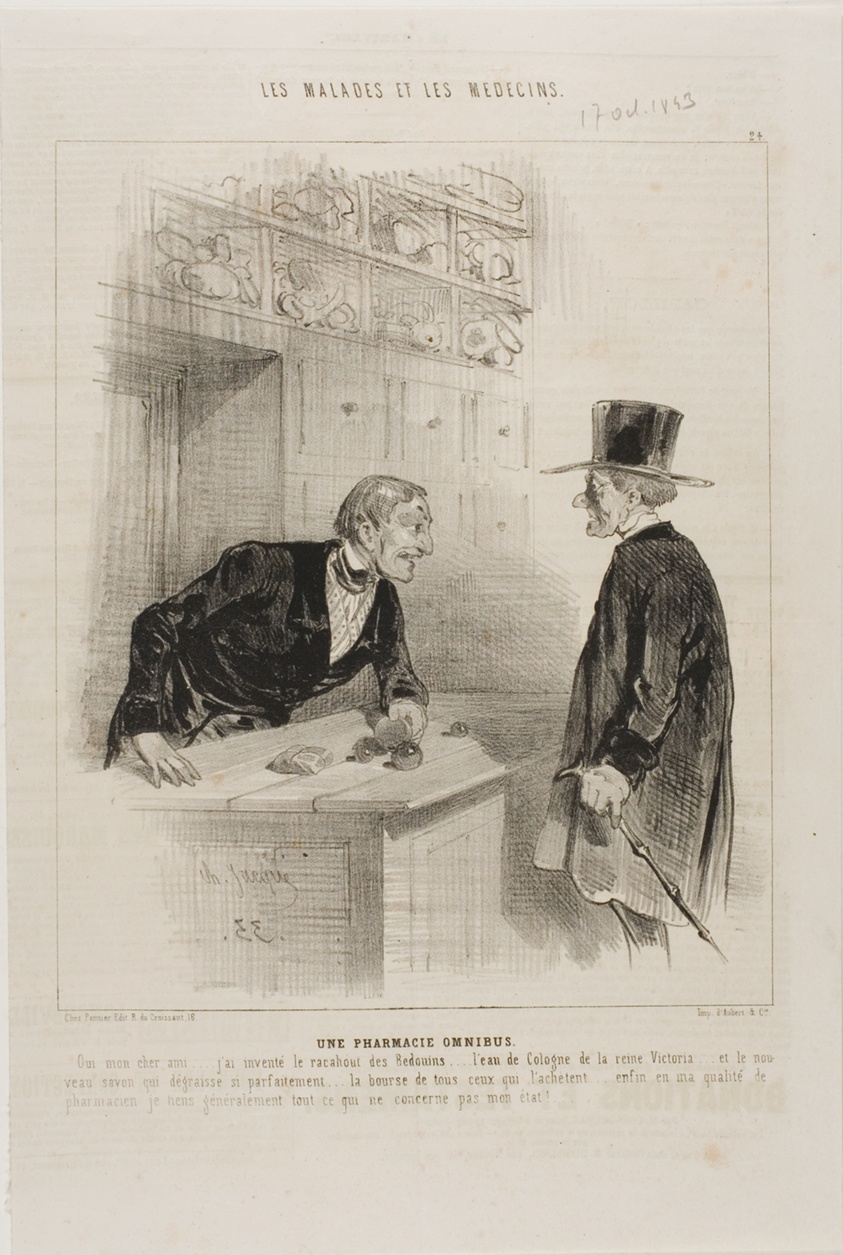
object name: Print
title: A Pharmacy for Every Need (plate 24)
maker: Charles Émile Jacque (French, 1813-1894)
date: 1843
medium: Lithograph in black on ivory wove paper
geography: France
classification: lithograph; print; prints and drawing